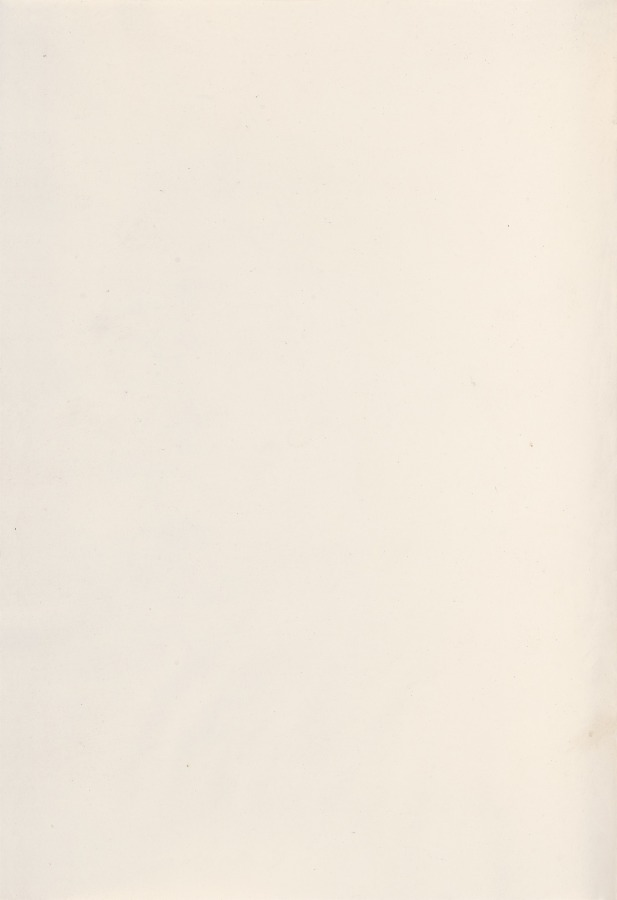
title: Hours of Queen Isabella the Catholic, Queen of Spain: Fol. 280v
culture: Flanders, Ghent and Bruges, late 15th century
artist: Master of the First Prayerbook of Maximillian (Flemish, c. 1444–1519)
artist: and Associates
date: c. 1500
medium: ink, tempera, and gold on vellum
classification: Bound Volume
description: This manuscript was illuminated by a circle of at least five highly organized manuscript painters active in the Flemish cities of Ghent and Bruges. The principal illuminator was Alexander Bening, who painted the majority of the book's miniatures. Manuscripts produced by this circle of artists are renowned for the decoration of their borders, which typically feature a rich variety of realistically-painted flowers, birds, and butterflies. This prayer book, called a book of hours, was intended not for a cleric, but for the private devotions of a lay person-in this case, Isabella the Catholic, Queen of Spain (1451-1504). Isabella's coat of arms embellishes the book's frontispiece. It is unlikely that the book was commissioned by the Queen herself; rather, she probably received it as a diplomatic gift from someone courting her patronage, perhaps Cardinal Francisco Jimenez de Cisneros. A Franciscan friar, Jimenez was dependent upon Isabella for his advancement, first to the post of Queen's confessor in 1492, and then to Archbishop of Toledo in 1495.